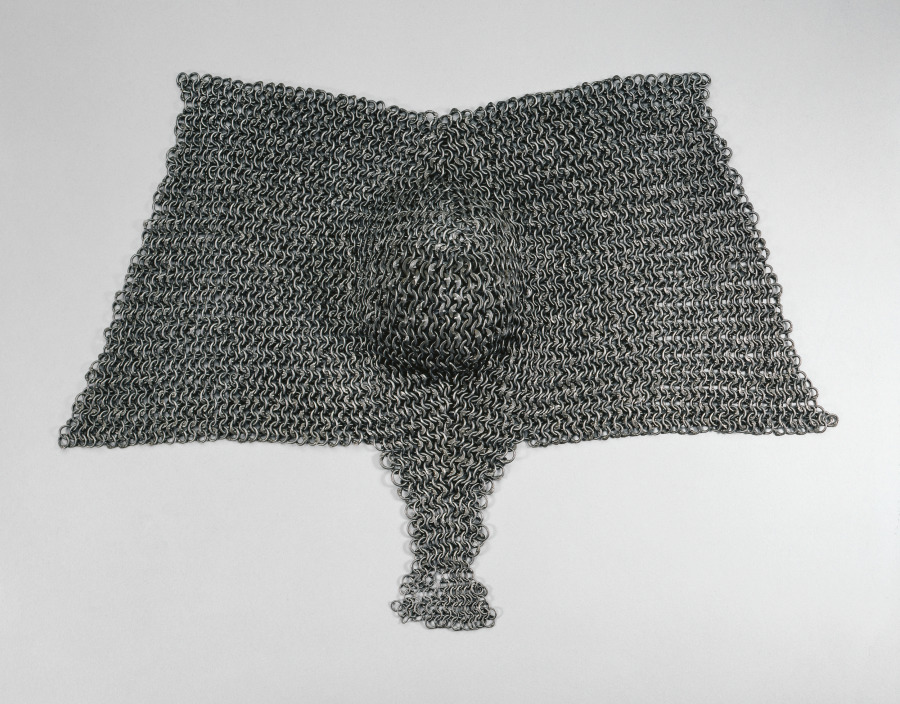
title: Brayette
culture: European, 15th century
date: 1400s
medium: riveted steel rings; strongly reinforced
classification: Arms and Armor